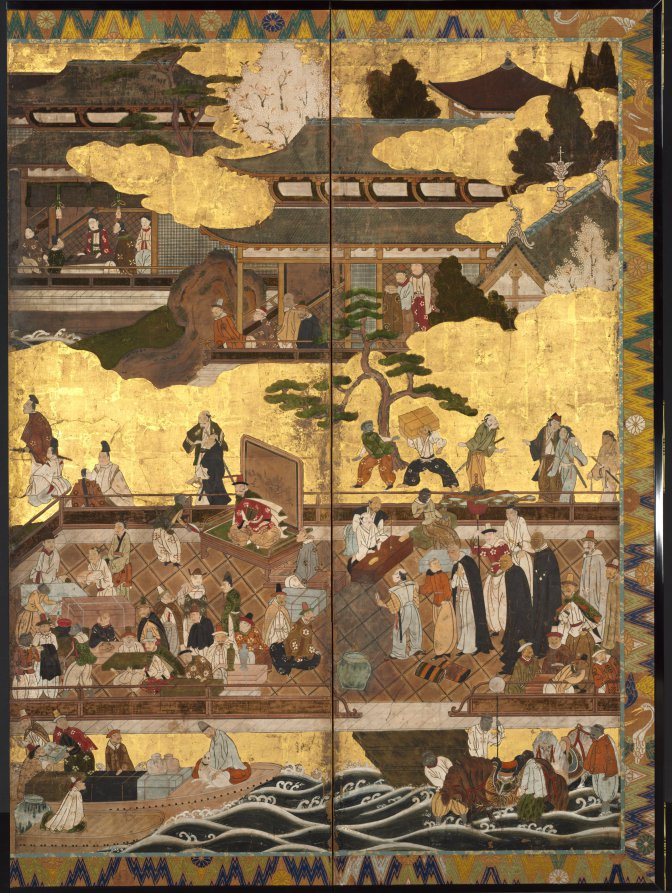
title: Arrival of the "Southern Barbarians"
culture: Japan, Momoyama period (1573–1615)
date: c. 1600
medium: One of a pair of six-panel folding screens; ink, color, and gold on paper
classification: Painting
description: This screen and its corresponding screen show Portuguese merchants arriving in Japan, having crossed the oceans in their large ship with a multinational crew. The Portuguese were known in Japan as the “Southern Barbarians” because they arrived from the south and their customs and manners were unfamiliar to the Japanese, who had not encountered anyone from Europe until their first appearance in 1543. In 1639, the Portuguese were forced out of Japan, mainly owing to internal difficulties caused by their Catholic missionaries, but they were a major conduit for both objects and ideas from Europe for nearly 100 years.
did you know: Europeans were called "Southern Barbarians" because their ships arrived in Japan from the south.